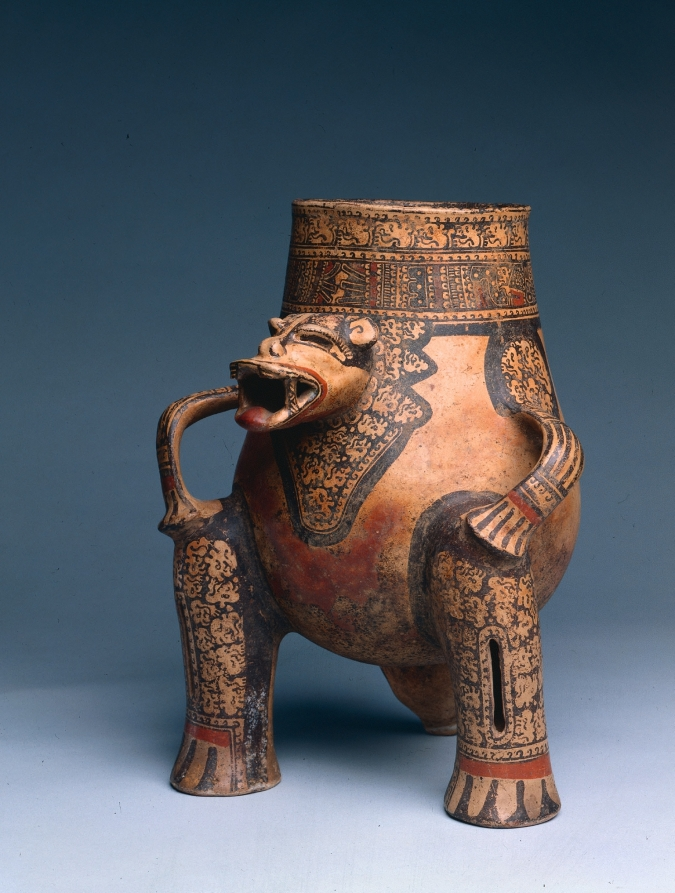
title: Vessel: Jaguar(?)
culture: Costa Rica, Southern Nicoya region, Pataky Polychrome style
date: c. 1000–1550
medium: ceramic, slip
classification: Ceramic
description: Artists of the Pataky style excelled in animal portrayals that typically combine a modeled head with a flat, boldly patterned vessel chamber, punned as the animal's body. The animals' meanings are unstudied, though it seems important that many strike human poses-creatures that combine human and animal traits often have mythic import.